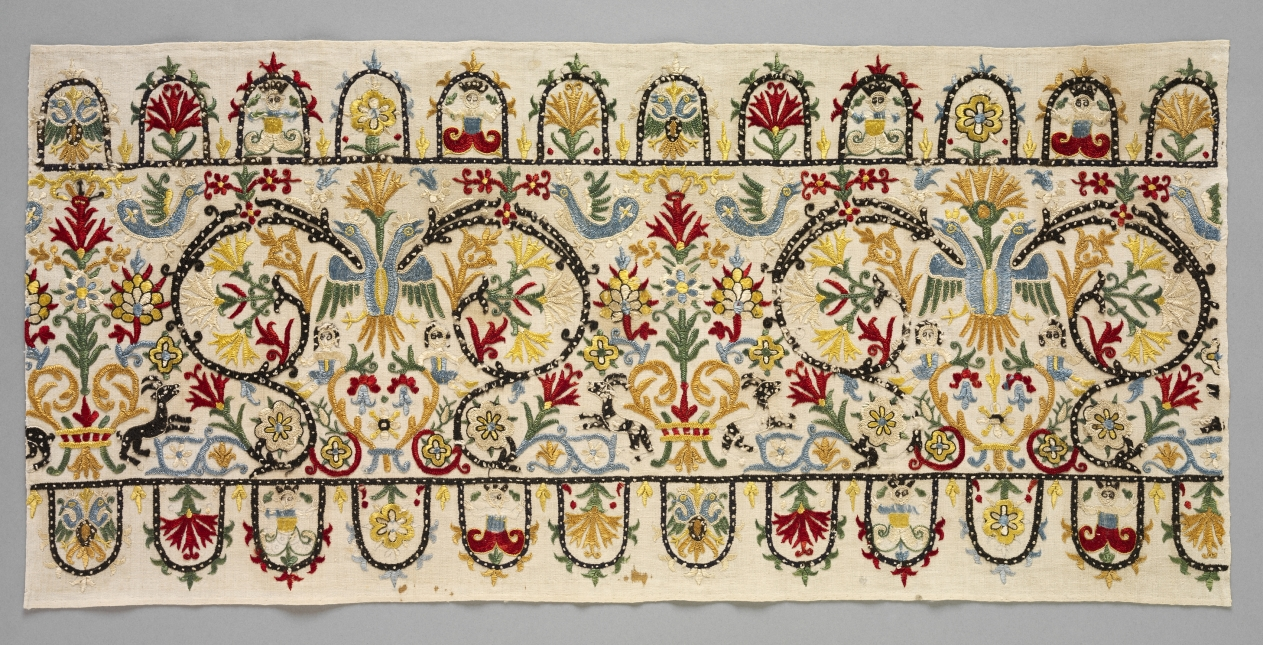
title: Border Strip of a Skirt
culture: Greece, Crete, 17th-18th century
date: 1600s - 1700s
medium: embroidery: silk on linen tabby ground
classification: Embroidery